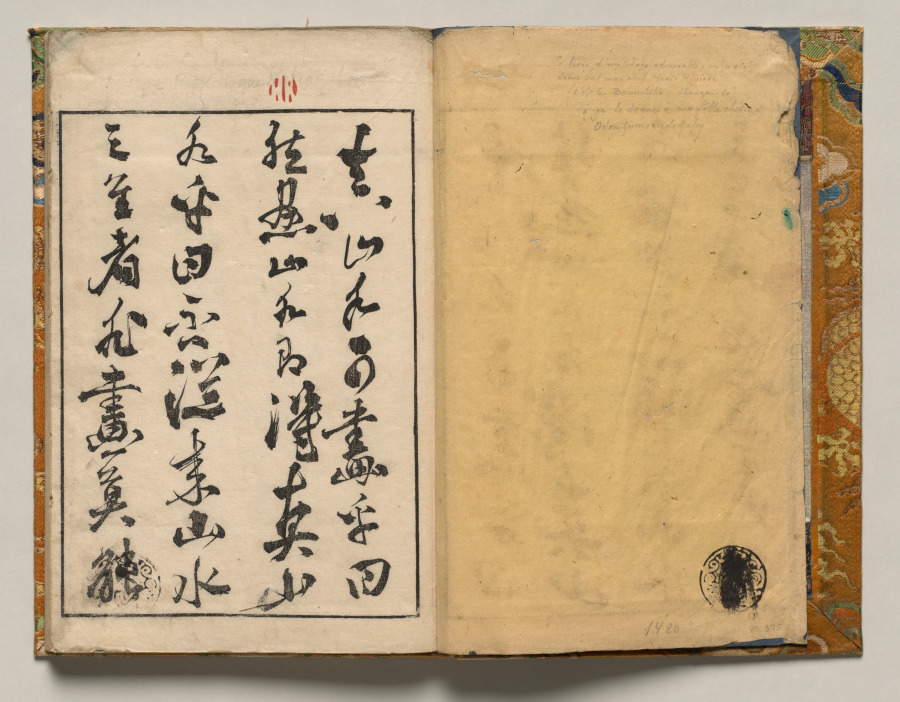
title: Preface from Shazanrō Picture Book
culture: Japan, Edo period (1615–1868)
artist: Tani Bunchō (Japanese, 1763–1841)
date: 1816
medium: Woodblock-printed book; ink and color on paper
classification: Bound Volume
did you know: Shazanrō was one of Tani Bunchō's style names.